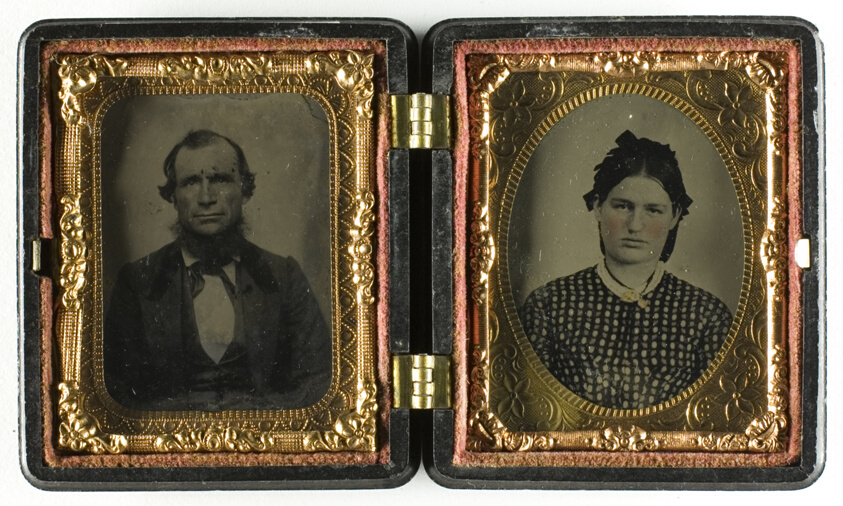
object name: Photograph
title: Untitled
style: 19th century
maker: Artist unknown; American, 19th century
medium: Daguerreotypes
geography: United States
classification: daguerreotype; photographic process; photography; photograph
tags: portraits, portraits: male subject, photography, portraits: female subject, portraits: multiple subjects